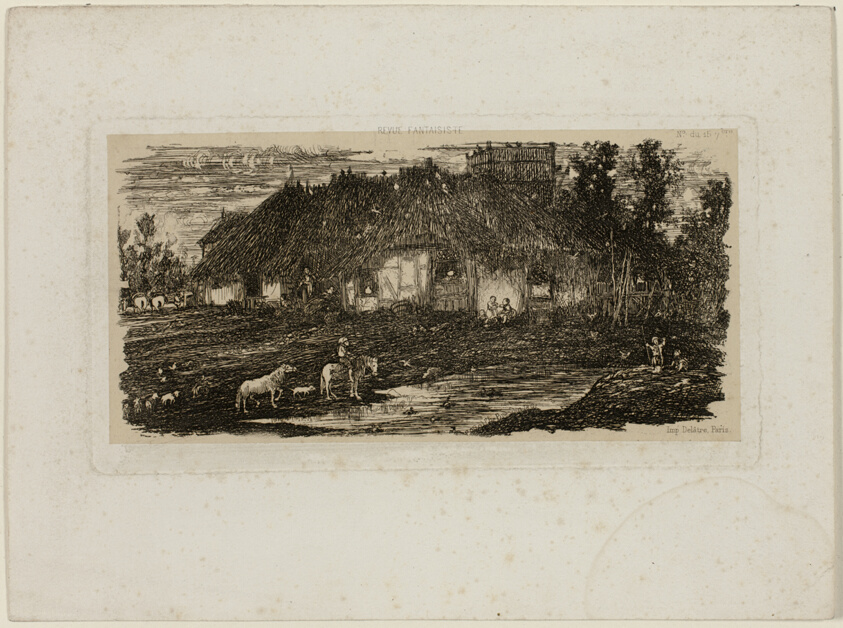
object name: Print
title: Farmyard, from Revue Fantaisiste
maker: Rodolphe Bresdin (French, 1825-1885)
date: 1861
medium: Etching on cream China paper laid down on white wove paper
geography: France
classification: etching; print; prints and drawing